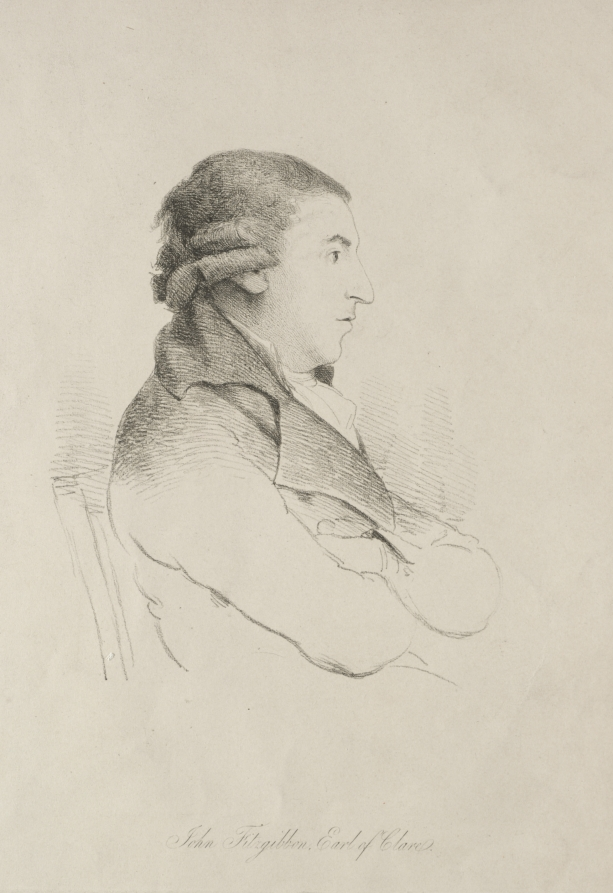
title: John Fitzgibbon, Earl of Clare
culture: England, early 19th Century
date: early 1800s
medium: lithograph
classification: Print